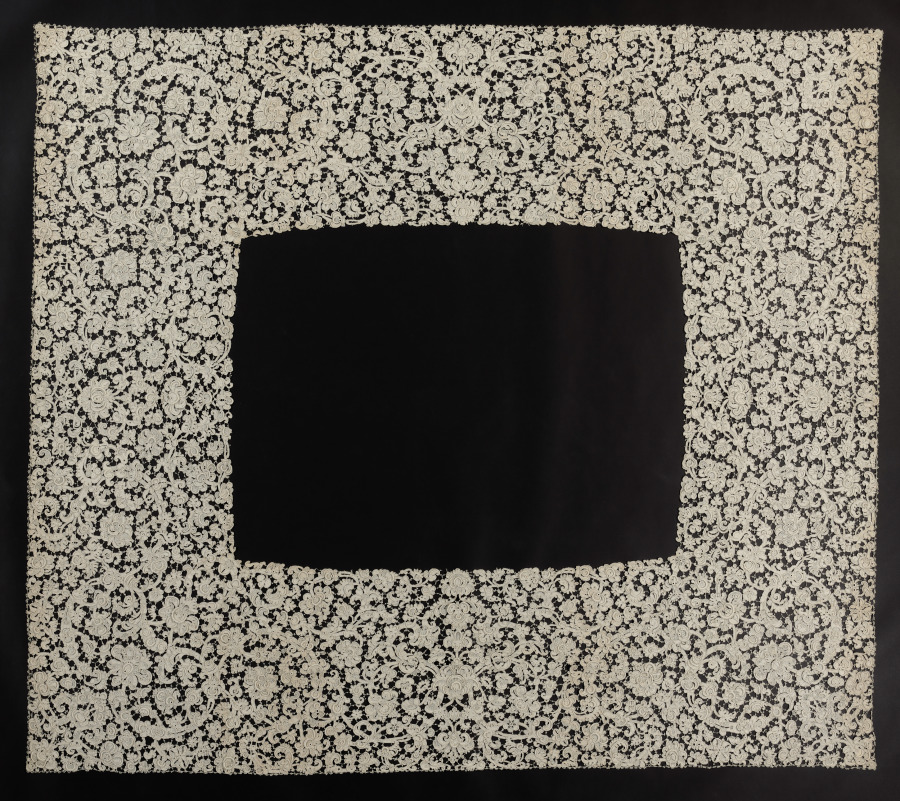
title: Lace Bed Cover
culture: Italy, Venice, 1660-1699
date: 1660–1699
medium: Needle lace (Venetian Raised Point)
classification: Lace